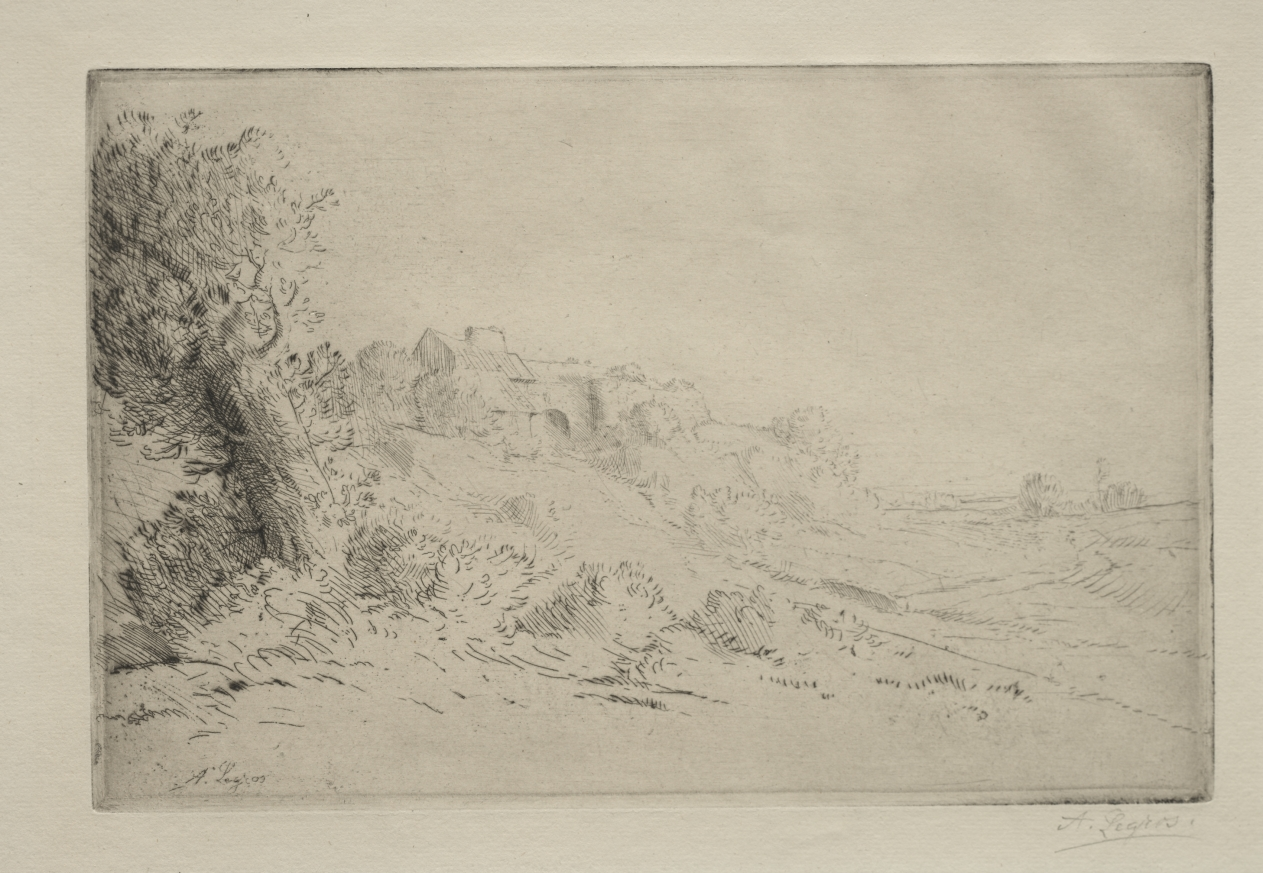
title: My Farm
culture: France, 19th century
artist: Alphonse Legros (French, 1837–1911)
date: c. 1857–1911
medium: drypoint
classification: Print